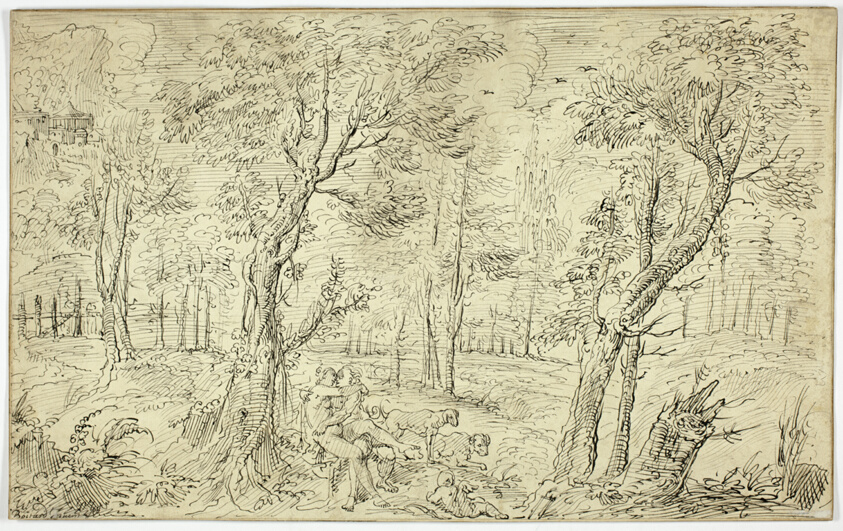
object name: Drawing and Watercolor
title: Venus and Adonis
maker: François Boitard (French, c. 1670-c. 1715)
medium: Pen and black ink on cream laid paper, laid down on buff laid paper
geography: France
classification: drawings (visual works); prints and drawing